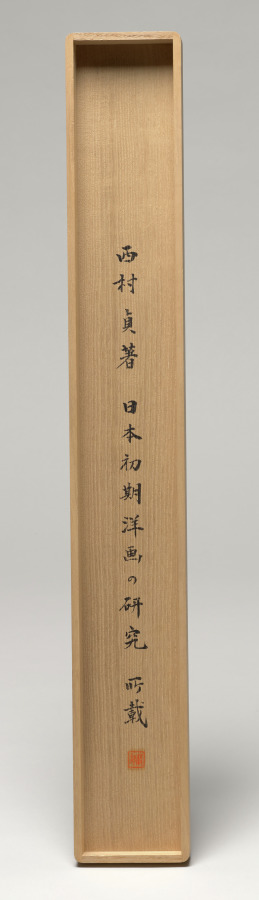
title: Portrait of Duli Xingyi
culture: Japan, Edo period (1615–1868)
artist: Kita Genki (Japanese, active c. 1664–98)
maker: Duli Xingyi (Chinese, 1596–1672)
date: 1671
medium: hanging scroll; ink and color on paper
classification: Painting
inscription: 1671 inscription at top of scroll by Duli Xingyi with three seals, 東矣䪩 (prefatory), 遺世獨立 (top) , 天外一閒人 (bottom); seal of Genki at lower left of painting 元規 .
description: In this portrait, the Ōbaku school Buddhist monk Duli Xingyi (born Tai Li, 1596–1672), whose name is pronounced Dokuryū Shōeki in Japanese, sits upon a woven mat holding a ceremonial scepter known as a ruyi, or nyoi in Japanese. Above his head is an insciption he added to the painting in 1671, the year before his death. It may be translated to read: Contemplative emptiness: the moon suspended over the village at midnight. Suddenly my soul is startled by the howl of an ape. Who could know that it would arouse me beyond my senses, and bring me an inner vision from Mt. Sumeru. (translated by Stephen Addiss and Kwan S. Wong) Originally from what is now the city of Hangzhou in China, Duli emigrated to Japan in 1653, where he took monastic vows. His skills in calligraphy and seal carving were formidable. Painter Kita Genki combined Chinese brush styles he learned in Nagasaki with Western painting techniques to capture Duli's likeness.